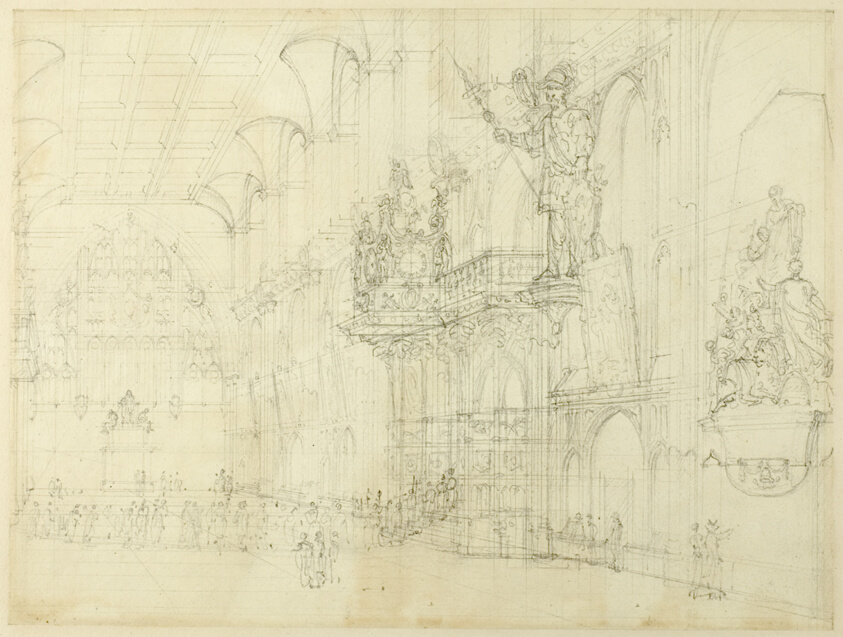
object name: Drawing and Watercolor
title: Study for Guild Hall, from Microcosm of London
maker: Augustus Charles Pugin (English, born France, 1762-1832); Thomas Rowlandson (English, 1756-1827)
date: c. 1808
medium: Graphite on ivory wove paper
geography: England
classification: graphite; drawings (visual works); prints and drawing